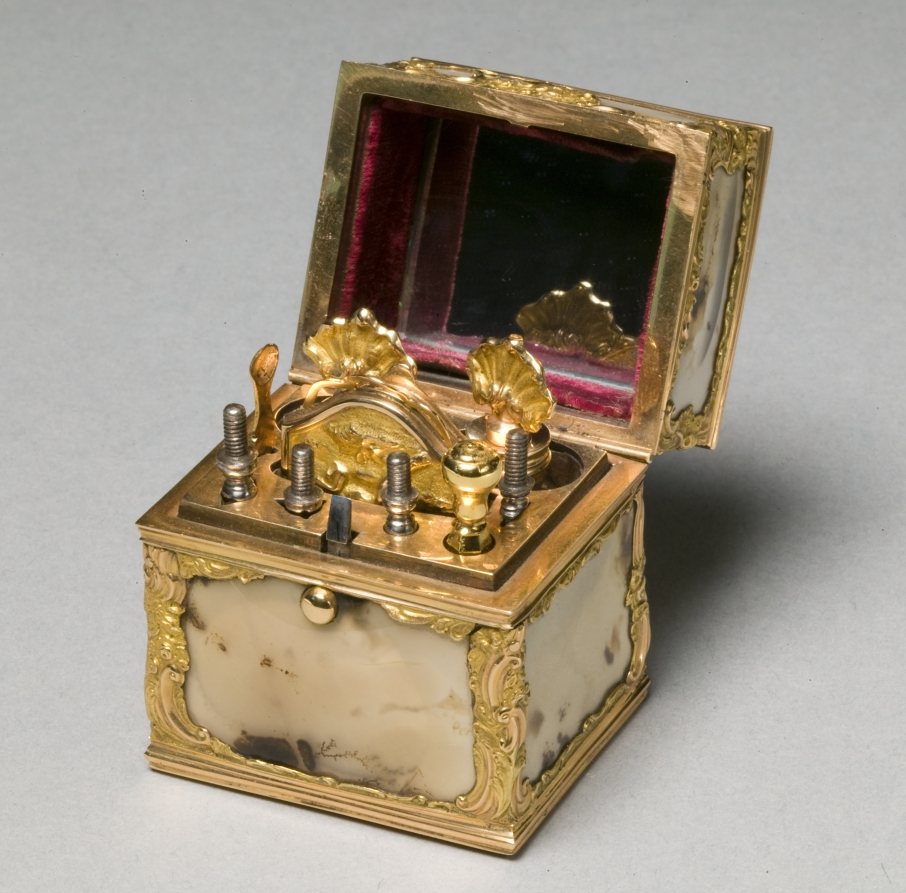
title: Vanity Case (Nécessaire)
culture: England, mid 18th century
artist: manner of James Barbot (British)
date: c. 1760–65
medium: gold, agate, interior fitted with implements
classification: Miscellaneous